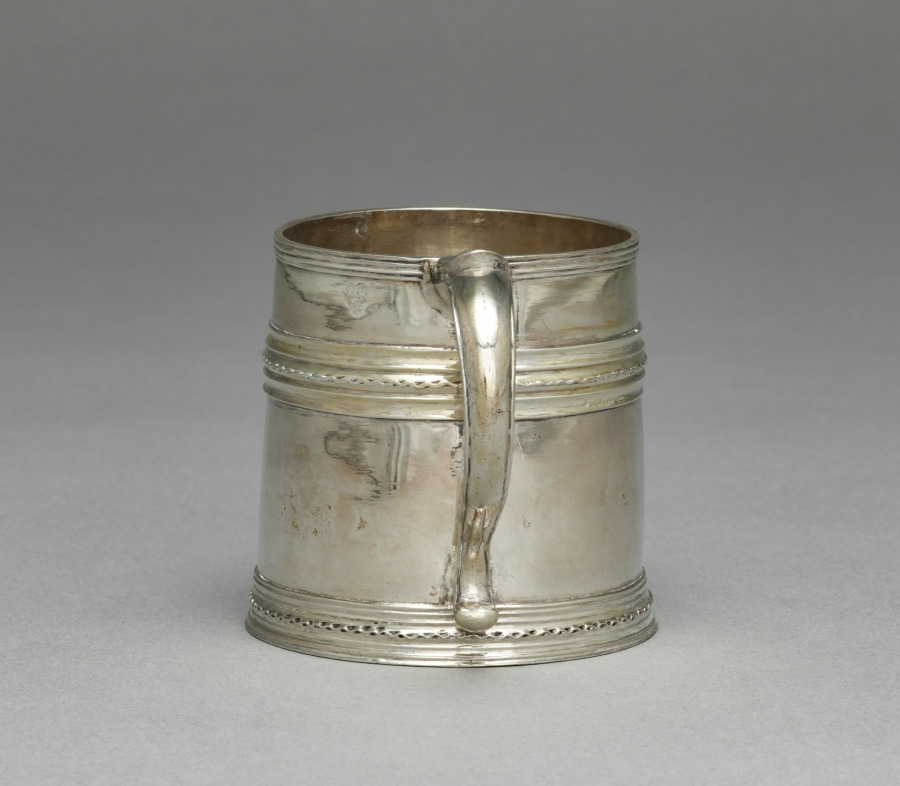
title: Cup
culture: America, New York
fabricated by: Benjamin Wynkoop (American, 1675–1728)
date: 1700–1725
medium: silver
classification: Silver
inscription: engraved: "W" over "C*G" in block letters on front of cup, opposite handle.